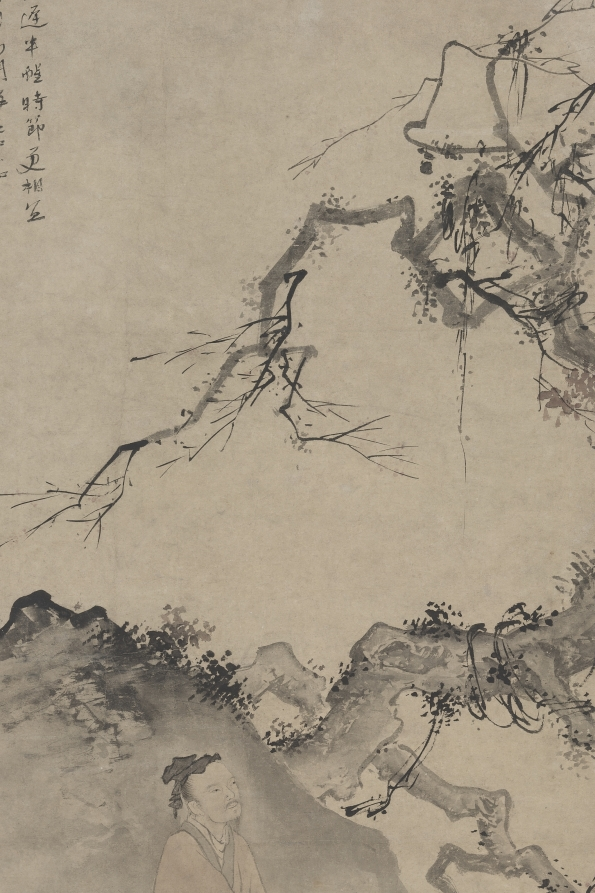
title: The Poet Lin Bu Wandering in the Moonlight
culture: China, Ming dynasty (1368–1644)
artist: Du Jin (Chinese, 1446-c. 1519)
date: late 1400s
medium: Hanging scroll; ink and color on paper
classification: Painting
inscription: 陪月閒行杖屨遲，半醒時節更相宜。 吟成疏影寒香句，為問梅花知不知。 檉居杜堇 [印]一書生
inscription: 1 seal of Zhang Heng 張珩 (1915–1963)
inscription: 1 seal of C. C. Wang [Wang Jiqian] 王季遷 (1907–2003)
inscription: 1 unidentified seal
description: Lin Bu (967–1028), a Northern Song (960–1127) poet and hermit who lived at the West Lake in Hangzhou, was known for having plum trees for his female companions and cranes for his children. This hanging scroll depicts the poet walking in the moonlight and looking at the plum tree, a scene described in his most well-known poem on plum blossoms. Surviving works signed by Du Jin are rare and this painting is one of them. Here, the artist used lively brushwork to depict the plum tree and rocks, exemplified in varying dots and strokes, and sweeps in different shades of ink.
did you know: Lin Bu withdrew from prestigious government service and lived as a hermit by the West Lake in Hangzhou.